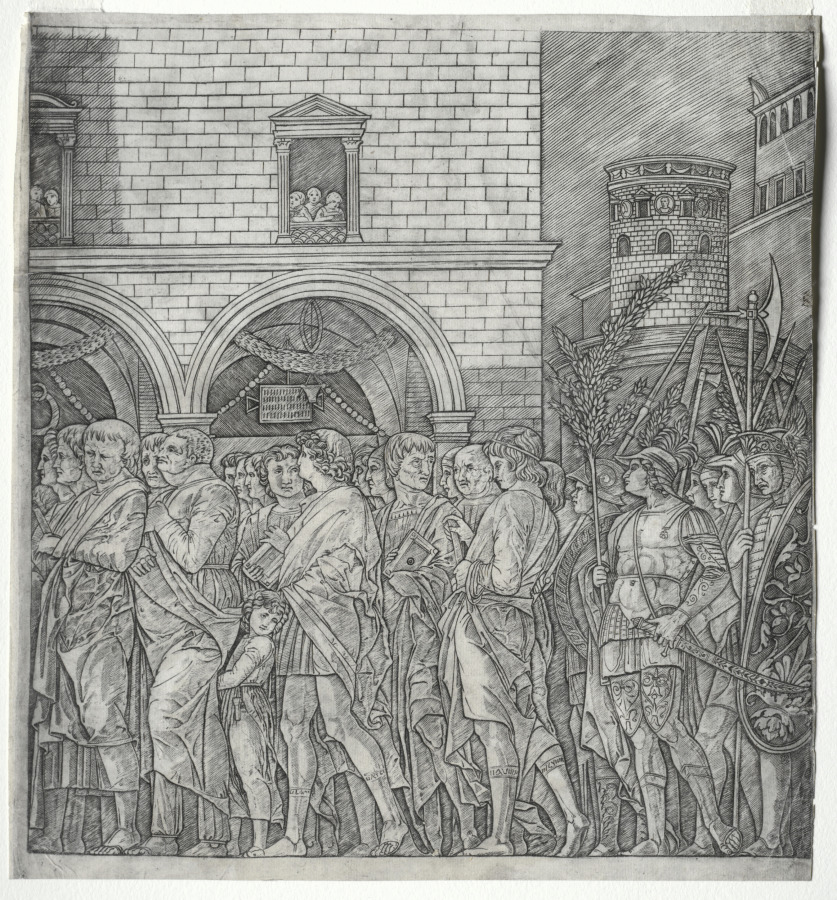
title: Triumph of Caesar: The Senators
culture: Italy, late 15th-early 16th century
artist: attributed to Giovanni Antonio da Brescia (Italian)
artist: school of Andrea Mantegna (Italian, about 1431–1506)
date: c. late 1400s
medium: engraving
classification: Print